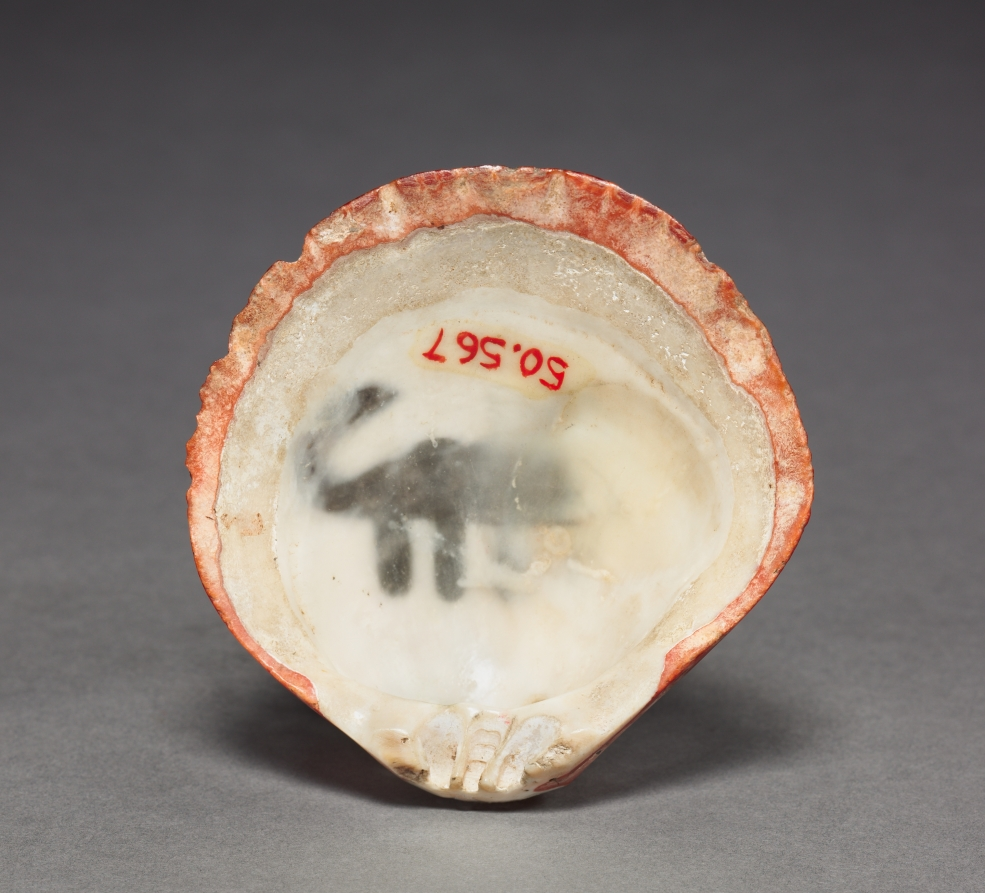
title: Shell with Inlaid Feline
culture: Peru, South Coast, Nasca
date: 100 BCE–700 CE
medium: Spondylus shell with shell, stone, and gold inlay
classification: Jewelry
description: This ornament is made of a spondylus shell, from which the exterior surface has been carved away to reveal a layer of bright orange. The pampas cat inlaid on the surface in multicolored shell and stone has bean-shaped spots on his body, and grasps a gold gourd or fruit. In both Paracas and Nasca art, the small, non-domesticated pampas cat is strongly associated with beans and other crops. Perhaps it was thought to guard the fields from rodents and other pests.